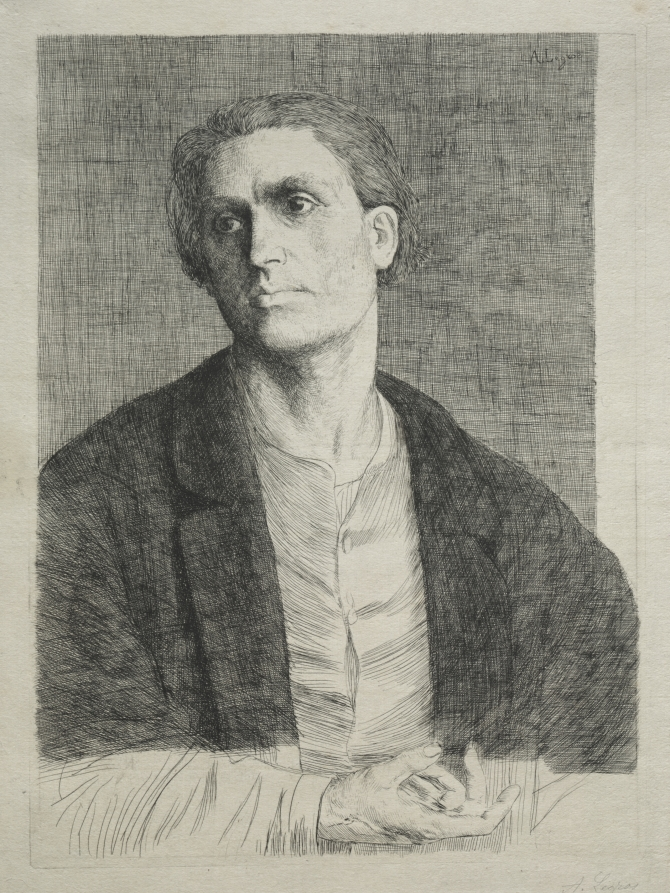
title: Study of a Man's Head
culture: France, 19th century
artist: Alphonse Legros (French, 1837–1911)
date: c. 1857–1911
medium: etching and drypoint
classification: Print